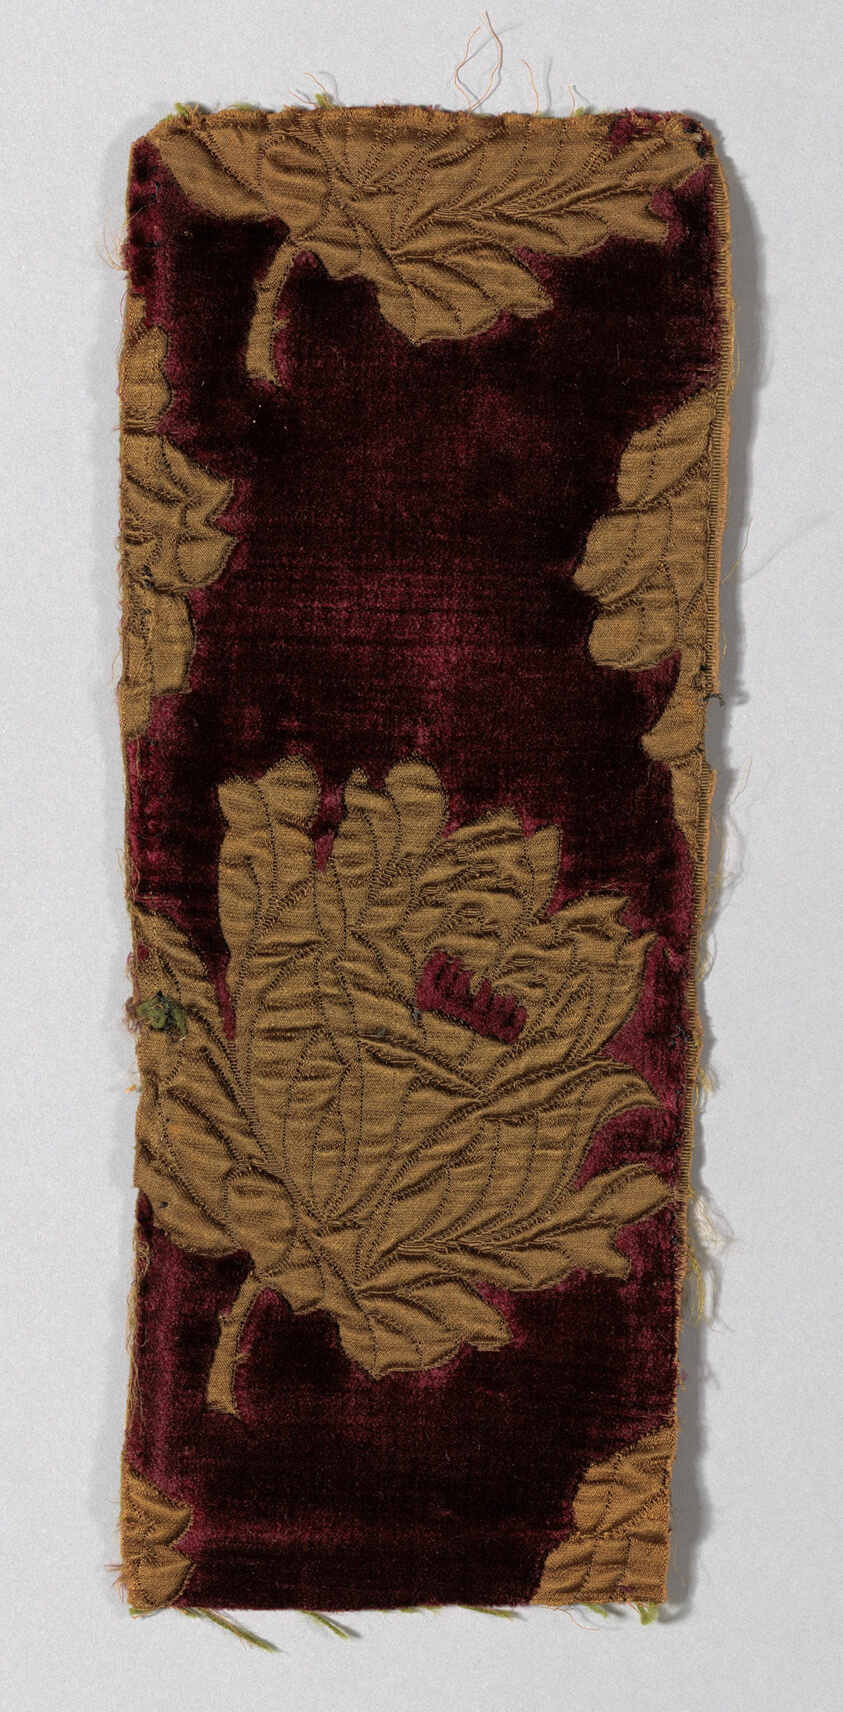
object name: Textile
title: Matelasse (pieces from dress 1923.1639a)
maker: France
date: c. 1885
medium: Garnet velvet with moss green satin allover design of single large roses. Velvet, satin and wool. Matelasse is Jacquard figured fabric of heavy compound weave having raised pattern as if quilted or wadded. It was made of all materials or combinations of materials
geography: France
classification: textile; weaving; costume - weaving; weaving - velvet; costume